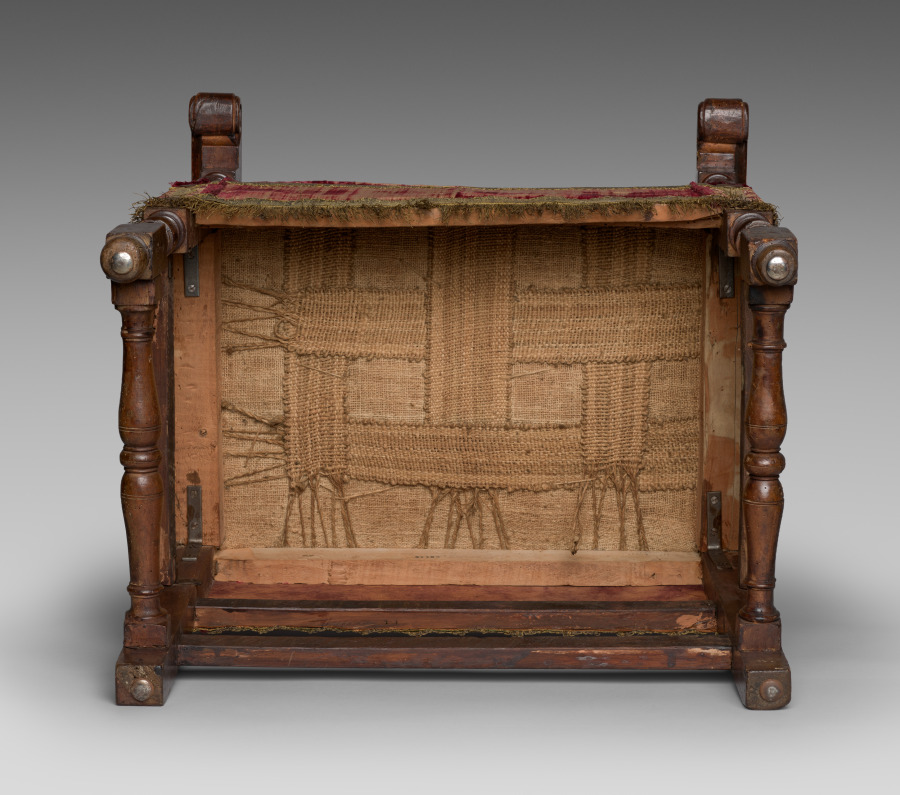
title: Armchair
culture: Italy, 17th century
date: 1600s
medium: walnut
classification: Furniture and woodwork